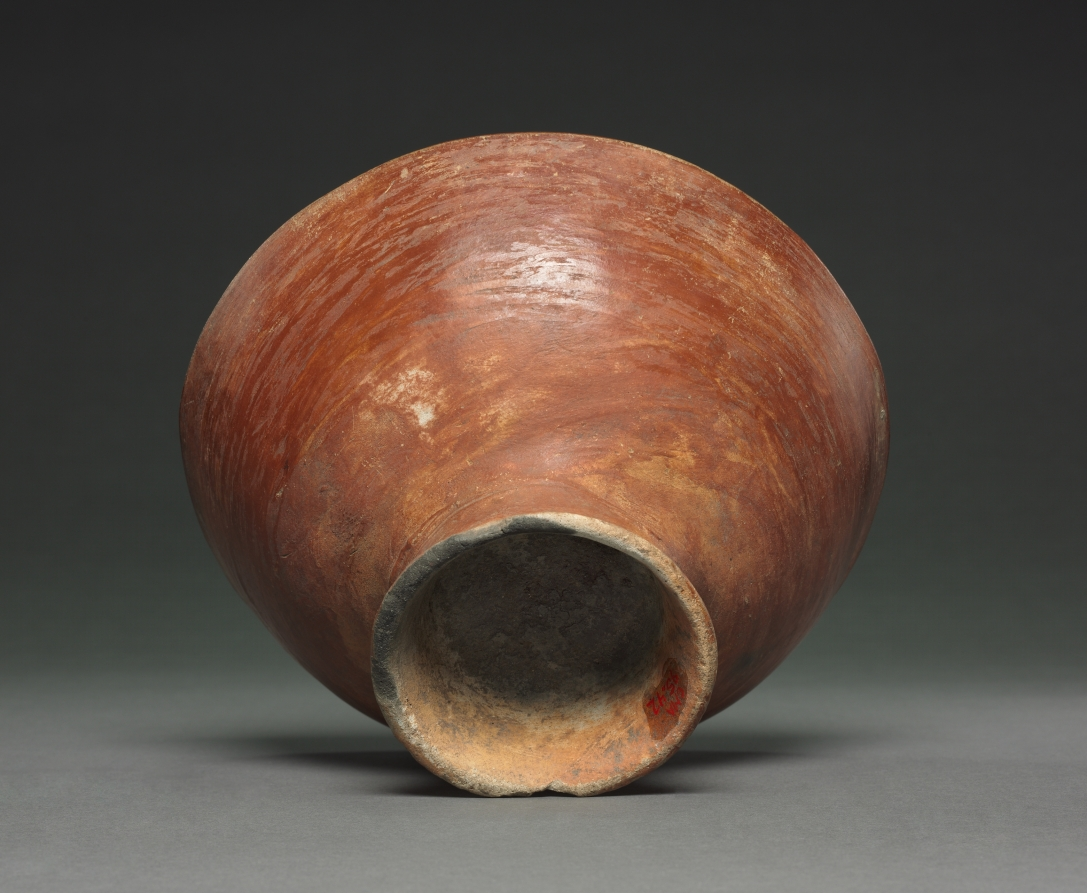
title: Bowl with Humans and Birds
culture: Colombia, Highland Nariño region,Tuza style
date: c. 1250–1550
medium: earthenware with colored slips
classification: Ceramic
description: In the Nariño region of southwestern Colombia, the dead were buried in shaft tombs, the most elaborate up to sixty feet deep and furnished with offerings such as these bowls. Colombian ceramics are not much studied and little can be said about their imagery, which reveals a keen interest in geometric abstraction. Depicted here are a row of figures with thatch-roofed huts, humans attacked by birds, and spiders.